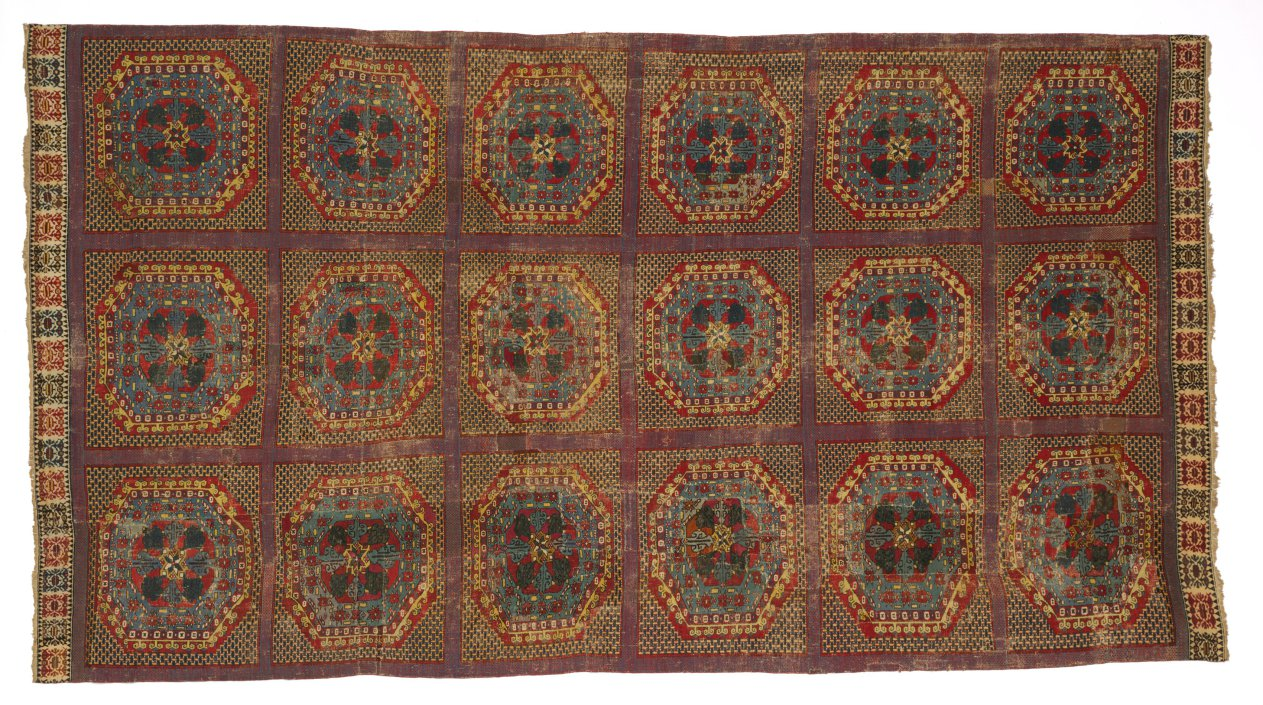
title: Spanish Carpet with a Turkish Pattern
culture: Spain, Alcaraz?, Mudejar, 15th century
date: c. 1450–1500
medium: wool, knotted pile: Spanish knot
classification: Carpet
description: Muslim weavers in Spain manufactured colorful woolen carpets with patterns derived from native Iberian designs, luxury silks, and imported Turkish carpets, such as this rare example. It is the only known carpet with this pattern of octagons framing a radiating central star. It is related to so-called large-pattern Holbein carpets, named after the Flemish painter Hans Holbein the Younger (1497-1543) who represented them in his paintings. This relatively well preserved 15th-century carpet is said to have come from a convent in Spain.